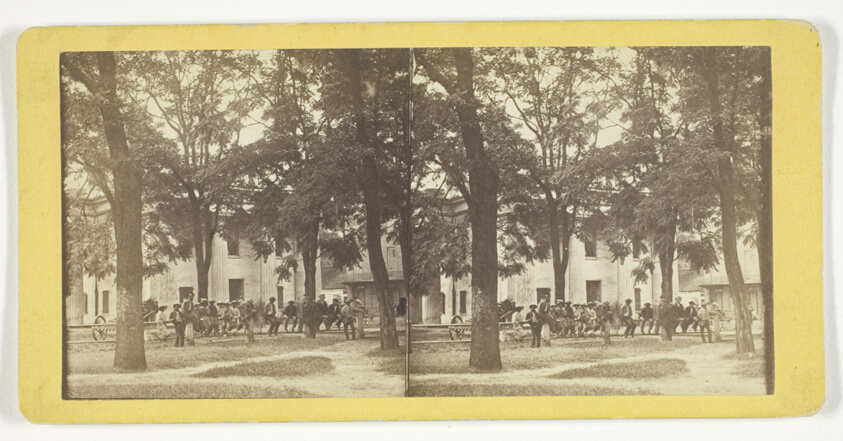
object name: Photograph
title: Court-house Savannah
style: 19th century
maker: J. N. Wilson (American, 1827–1897)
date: 1860/80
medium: Albumen print, stereo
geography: United States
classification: stereograph (albumen); albumen silver print; photographic process; photography; photograph